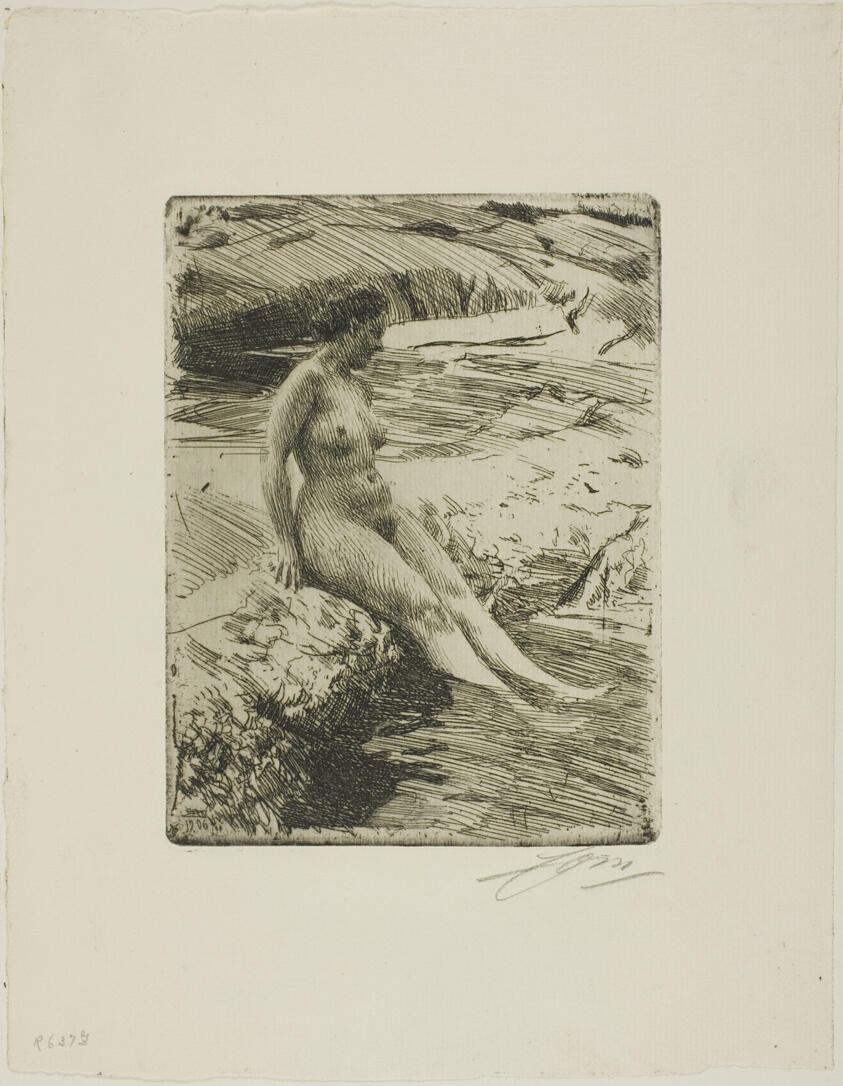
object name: Print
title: Sandhamn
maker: Anders Zorn (Swedish, 1860-1920)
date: 1906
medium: Etching on ivory laid paper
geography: Sweden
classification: etching; print; prints and drawing